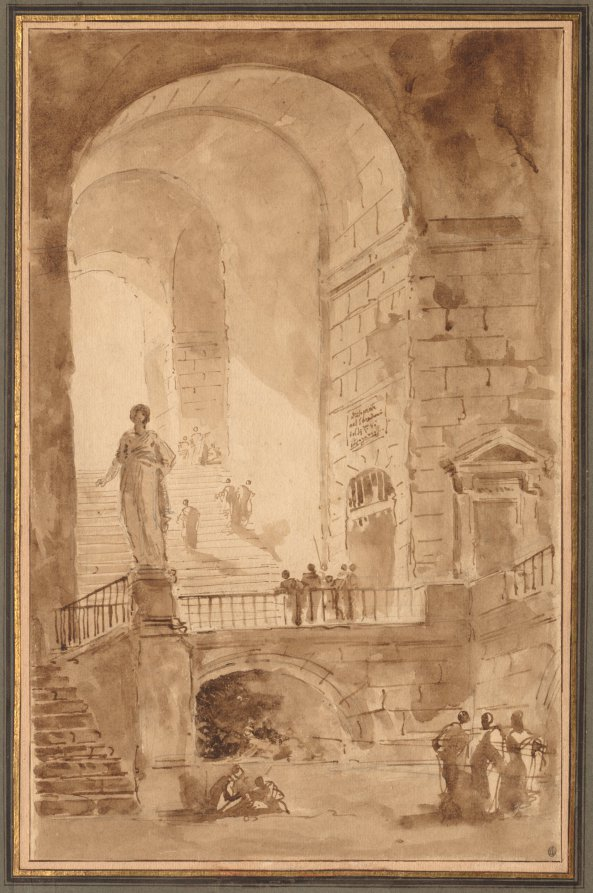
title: Vaulted Staircase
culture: France, 18th century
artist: Hubert Robert (French, 1733–1808)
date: c. 1770–79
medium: pen and brown ink and brush and brown wash over graphite; framing lines in brown ink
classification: Drawing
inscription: by artist, center, in brown ink: [Villaporta?] / nel S[illegible] / [illegible] / Stroganoff; verso of secondary support, upper left, in red chalk: fragonard delt / Collection de M Denon Directeur du Musée Napoleon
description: The inscription on the panel over the arched doorway seems to refer to Robert's Russian patron, Count Alexandre Sergevitch Stroganov, who was in Paris between 1770 and 1779 and commissioned a series of monumental paintings from Robert.